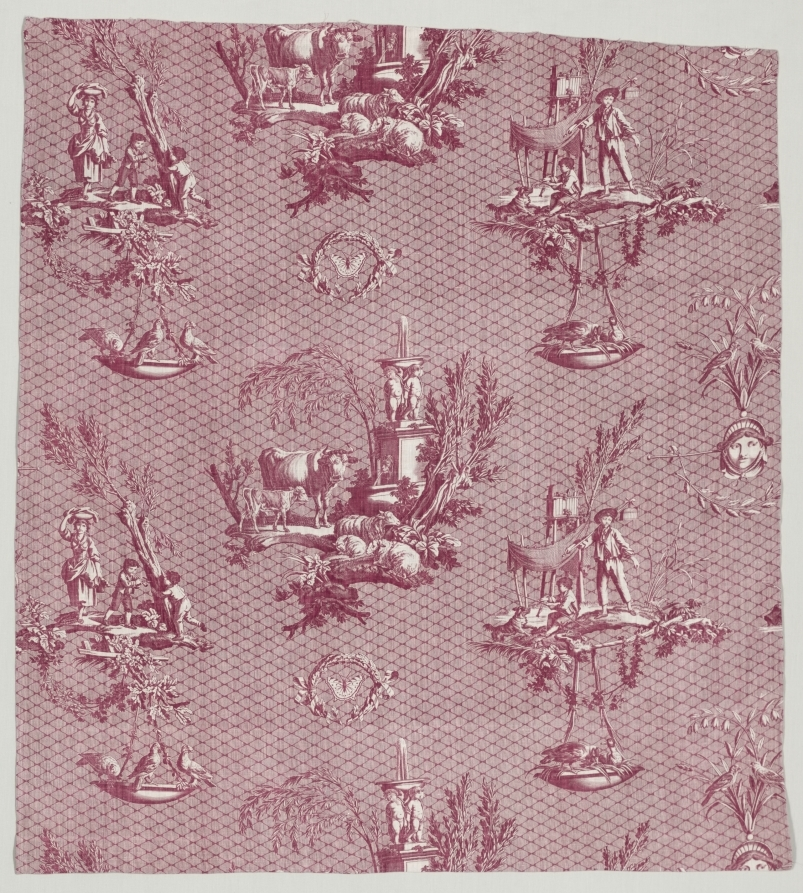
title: Strip of Copperplate Printed Cotton with "L'Oiseleur" Design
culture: France, Jouy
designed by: Jean-Baptiste Marie Hüet (French, 1745–1811)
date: c. 1800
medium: copperplate printed cotton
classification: Textile